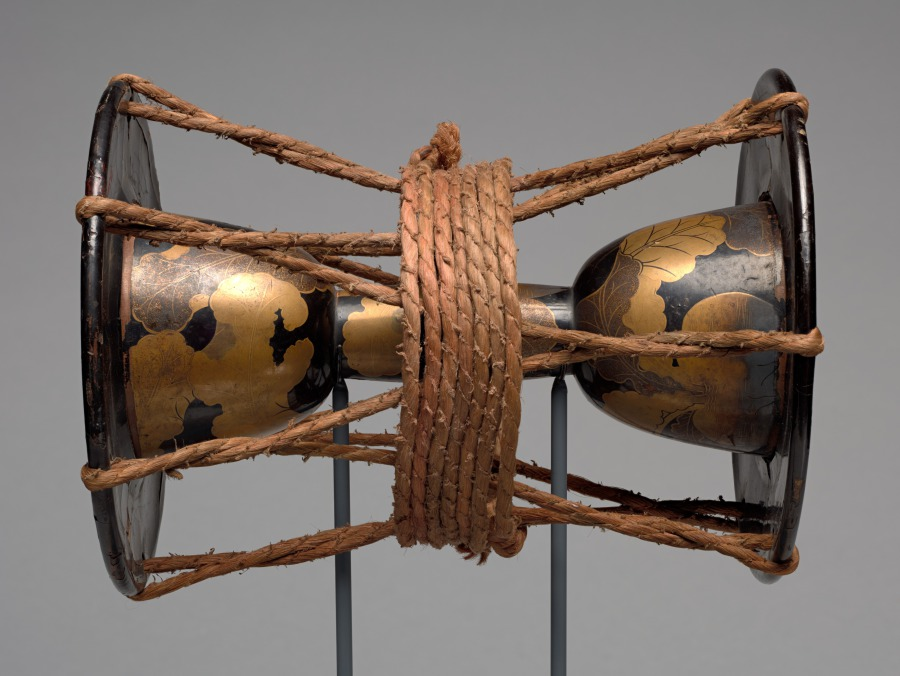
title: Tsuzumi Drum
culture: Japan, Edo period (1615–1868) to Meiji period (1868–1912)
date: 1800s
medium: Wood with lacquer and sprinkled gold powder (maki-e), hide, iron, and cord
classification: Musical Instrument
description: Tsuzumi hand drums were used as musical accompaniment for formal theatrical productions such as Noh, but also in traditional folk music. Small tsuzumi like this one are set against one shoulder, and held in place with one hand, while the other hand beats the heads. The sound is adjusted by regulating the humidity of the hide with one’s breath or spittle.